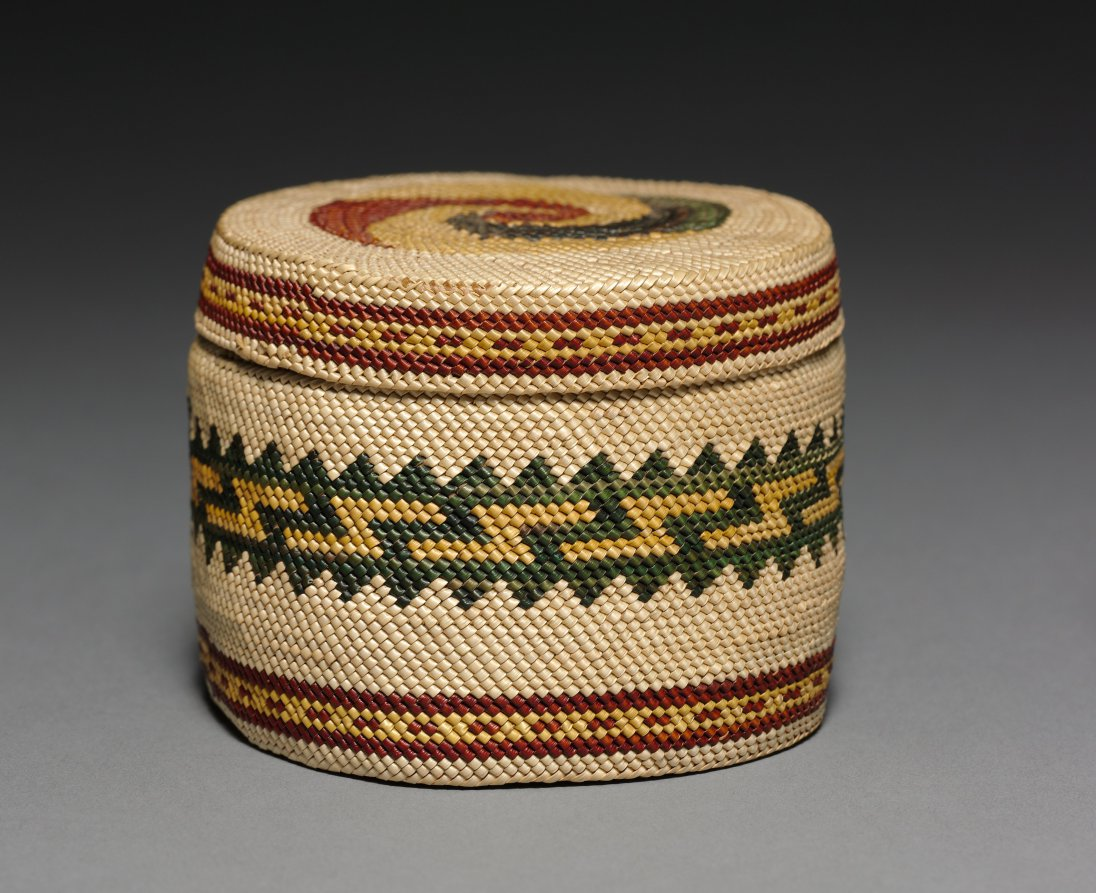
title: Covered Bowl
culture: Northwest Coast, Makah, late 19th-early 20th century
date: c. 1875–1925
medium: twined grasses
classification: Basketry